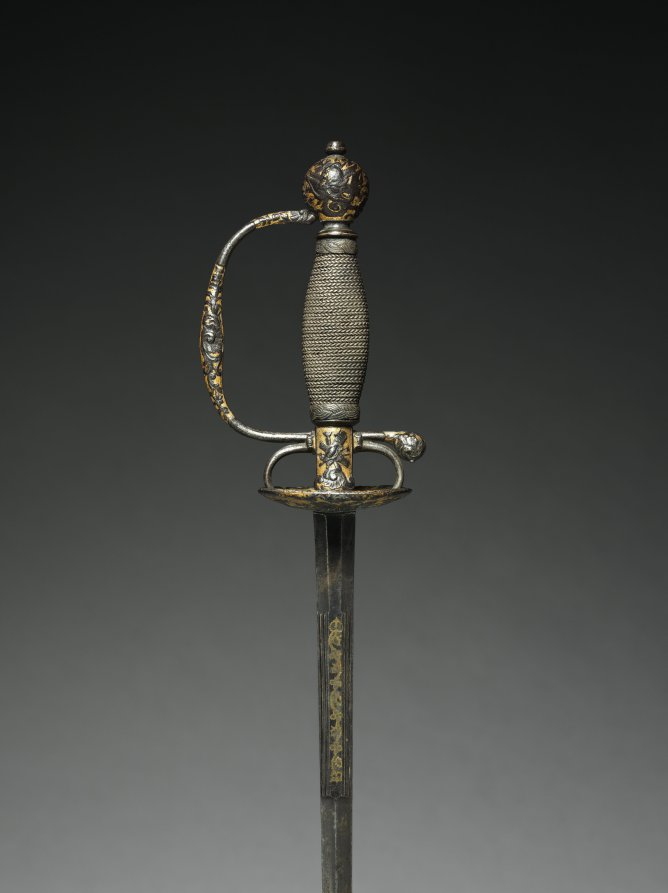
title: Child's Sword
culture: France, Paris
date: c 1780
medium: stainless steel, silver and brass wire inlay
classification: Arms and Armor